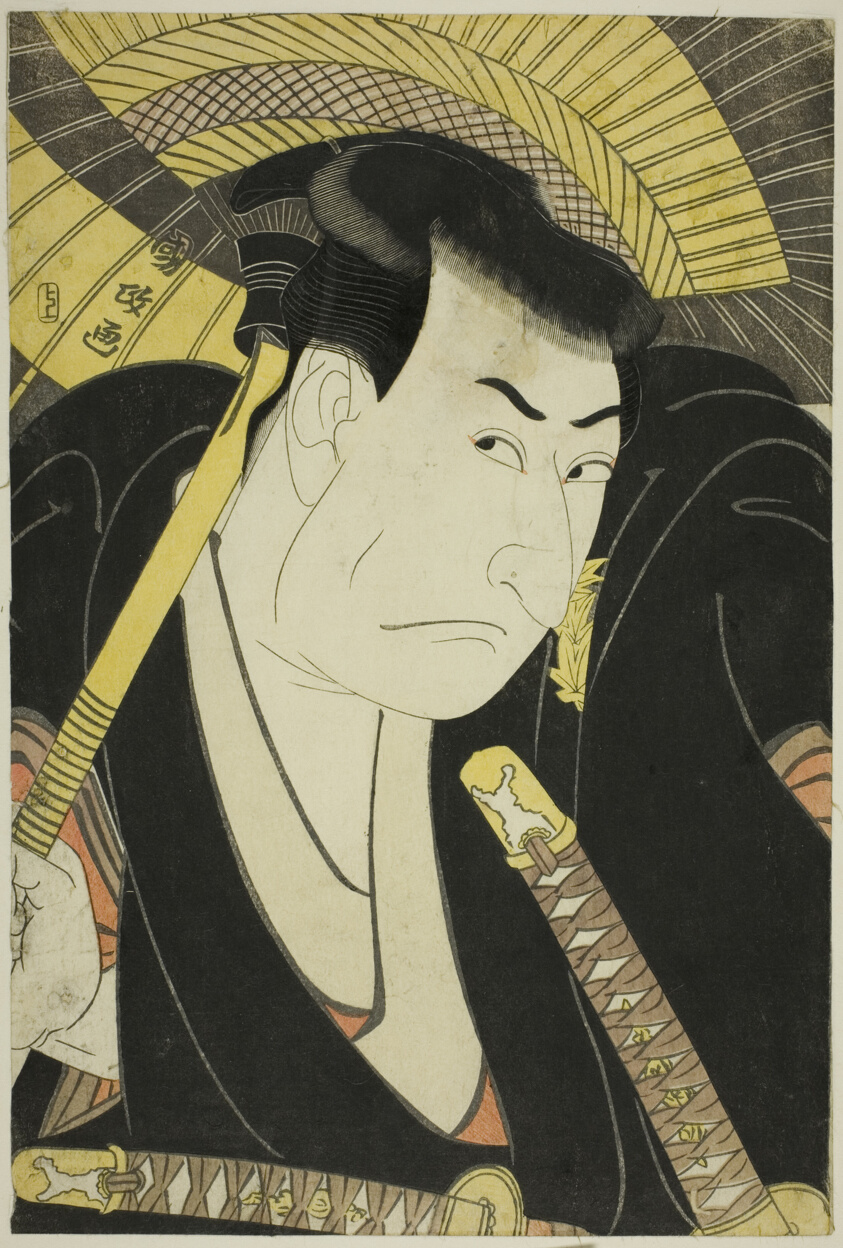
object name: Print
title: Ichikawa Omezo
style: Japanese (culture or style)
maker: Utagawa Kunimasa; Japanese, 1773-1810; Publisher: Yo-Ya Eikichi; Japanese, 19th century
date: 1794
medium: Color woodblock print; oban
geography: Japan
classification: woodblock print; print; asian art